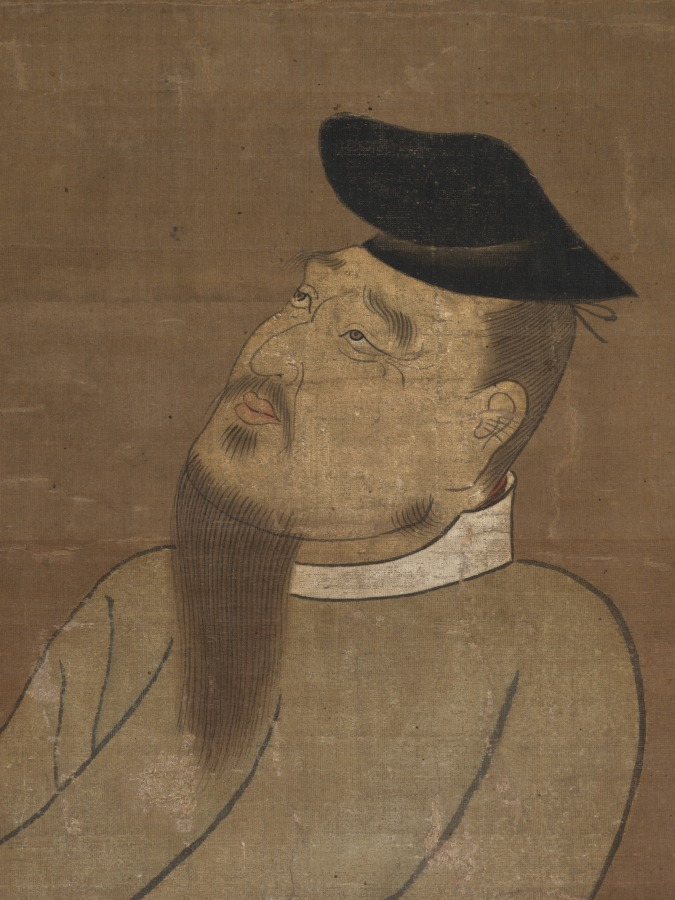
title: Kakinomoto no Hitomaro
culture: Japan, Kamakura period (1185–1333)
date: early 1300s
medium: hanging scroll; ink and color on silk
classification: Painting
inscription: 浦のあさ霧にしま隠れゆく舟をしぞ思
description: Among Japan’s greatest poets, Kakinomoto no Hitomaro’s (c. 660–724) portrait was often displayed at poetry competitions. Here, he gazes up at a falling cherry blossom, his writing box before him, brush and paper in his hands. A short biography and one of his poems are inked on painted rectangles meant to look like decorated papers. The first part of the poem has been mostly lost, but from what remains, it is possible to recognize it as Dimly, dimly in the morning mist that lies over Akashi Bay, my longings follow with the ship that vanishes behind the distant isle. —Translated by Robert H. Bower and Earl Roy Miner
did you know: The landscapes at the top and bottom of the painting depict Akashi Bay, with its famous pines along the shore, and a lone figure in a boat.